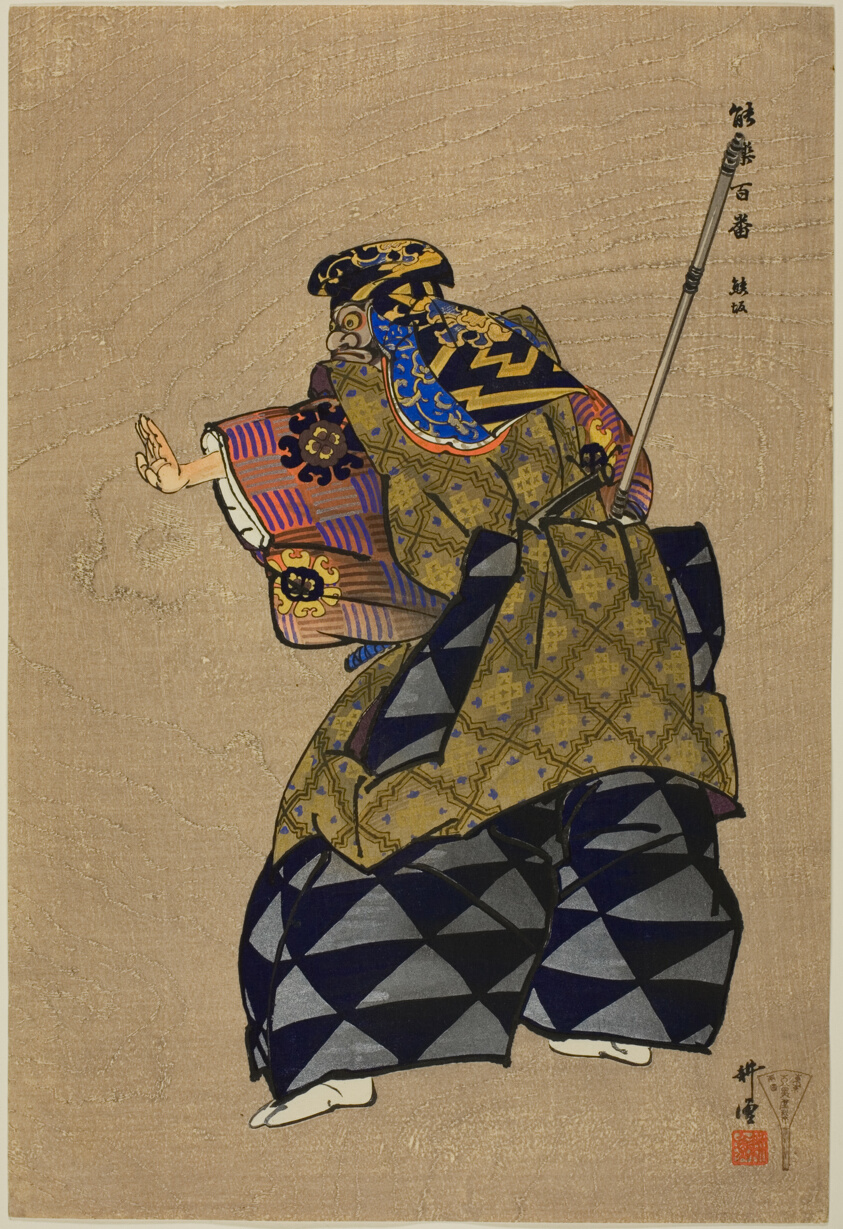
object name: Print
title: Kumasaka, from the series "One Hundred No Dramas (Nogaku hyakuban)"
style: Japanese (culture or style)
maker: Tsukioka Kogyo; Japanese, 1869-1927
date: 1898/1903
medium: Color woodblock print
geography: Japan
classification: woodblock print; print; asian art